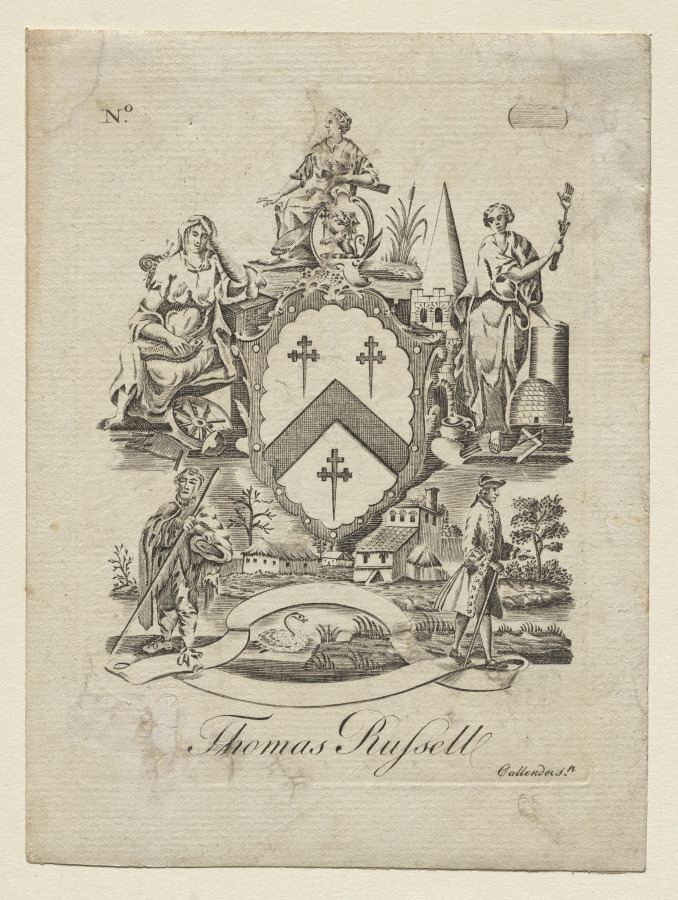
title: Bookplate: Coat of Arms with Thomas Russell inscribed below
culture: America, late 18th-early 19th century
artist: Joseph Callender (American, 1751–1821)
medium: engraving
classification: Print